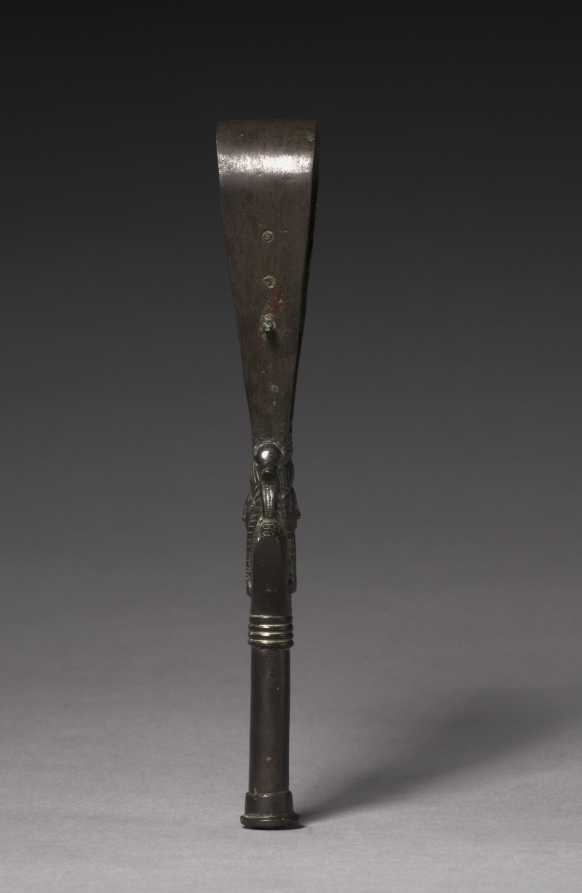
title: Arched Sistrum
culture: Egypt, Late period (715–332 BCE), Dynasty 30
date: 380–343 BCE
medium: bronze, hollow cast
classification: Implements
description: A sistrum is a musical rattle. Metal disks strung on wires along the arched upper end of the sistrum produced a rustling sound that was supposed to have a calming effect on the nerves of various deities, especially the goddesses Hathor and Bastet. Appropriately, this example is decorated with a Hathor head (a woman with cow’s ears) and a cat (the image of Bastet). These instruments are particularly associated with women, who played them as members of a temple choir.